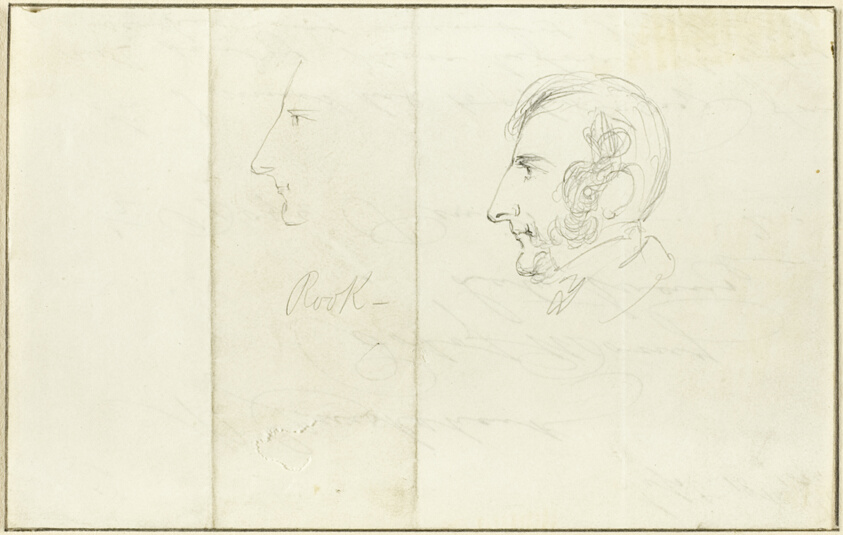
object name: Drawing and Watercolor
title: Two Self-Portraits in Profile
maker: George Cruikshank (English, 1792-1878)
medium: Graphite, on ivory wove paper, tipped on cream wove card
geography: England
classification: graphite; drawings (visual works); prints and drawing